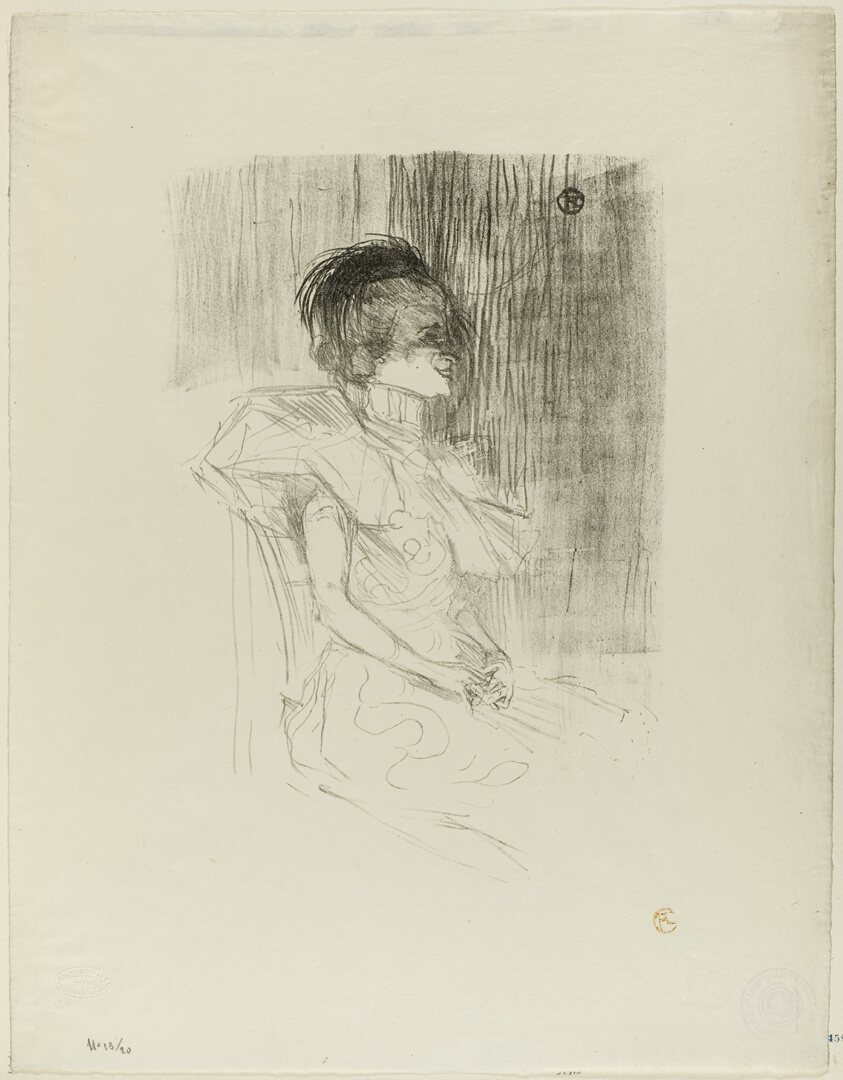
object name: Print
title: Lender Seated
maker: Henri de Toulouse-Lautrec (French, 1864-1901)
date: 1895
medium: Lithograph on ivory wove paper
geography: France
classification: lithograph; print; prints and drawing